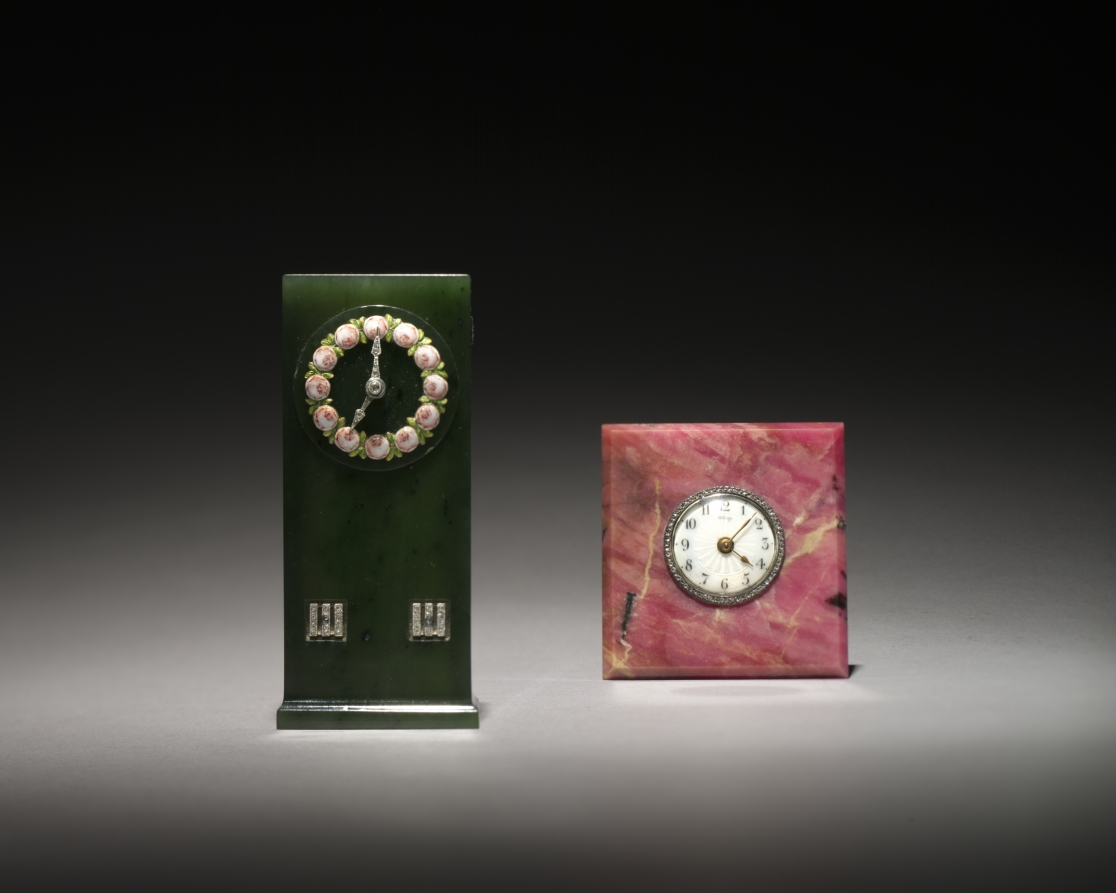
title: Clock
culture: Russia, St. Petersburg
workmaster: Henrik Wigström (Russian, 1862–1923)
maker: House of Fabergé (Russian, 1842–1918)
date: c. 1905–15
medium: rhodonite, silver, enamel, diamonds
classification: Timepiece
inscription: 88, Kokoshnik, lower-case alpha in script [assay mark for St. Petersburg, 1882-99]; H.W. [initials for workmaster Henrik Wigström]; Fabergé (in Cyrillic); 26217 scratched; swan. Fabergé in script on dial of clock; an abbreviation of "weekly wind" engraved in Cyrillic script on back.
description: The use of Russian hardstones in creating precious objects became a hallmark of design from the House of Fabergé. Easily carved, these minerals were sourced largely from the western region surrounding the Ural Mountains. Fabergé's workmasters used colorful stones such as agate, nephrite (jade), lapis lazuli, rock crystal, and rhodonite, seen here in this small desk clock, to create and embellish flower studies, animal figures, and all manner of luxurious accessories. Bright pink rhodonite was among the rarest, and consequently most expensive, specimens used by the House of Fabergé.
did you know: The bright pink color of this small desk clock is a result of manganese, the principle mineral found in rhodonite.